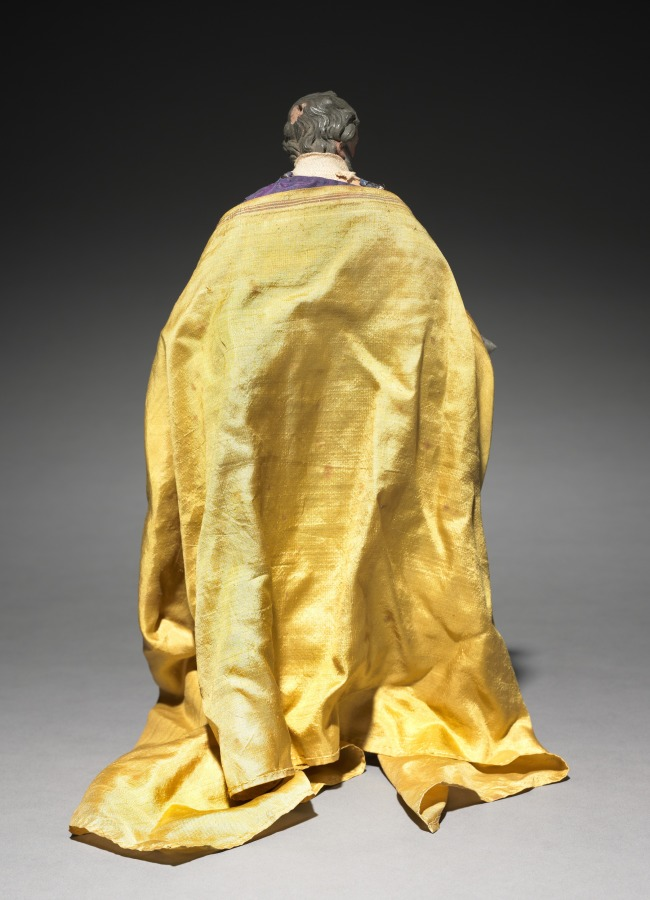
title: Figure from a Crèche: Joseph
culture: Italy, Naples, late 18th-early 19th century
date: 1780–1830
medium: painted wood and terracotta with various textiles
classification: Sculpture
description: The practice of creating scenes of the Nativity for the home dates from the early 1700s in Italy, where people began to set up doll-like figures of about a foot or less in height. The custom was particularly popular in Naples around 1800, where crèche scenes (crèche means cradle, or crib) included many figures, whose heads and hands of painted terracotta, stuffed cloth bodies, and clothing adapted from contemporary local costumes gave them an amazingly realistic character. Representations of the birth of Jesus can be traced to the first few centuries of Christianity. Both living creatures and sculptural depictions of them were used from early times. By the late middle ages it was customary to create life-size figures of wood or stone, naturalistically painted, to represent the characters who participated in the events of Jesus's early life. These sculptures were then arranged in scenes illustrating one or both of the most important of these events, the Adoration of the Shepherds and the Adoration of the Magi-the three kings from the East who came to pay homage to the Christ child. Used in churches, these large figures were especially popular in Italy, Central Europe, Spain, and Portugal.